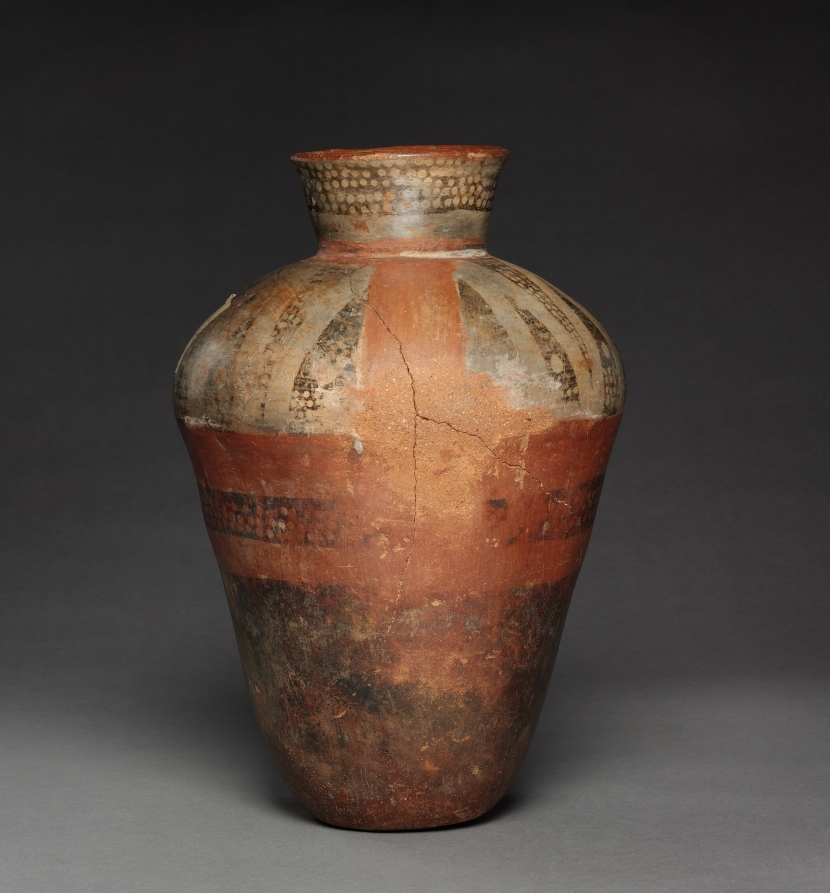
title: Vase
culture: Colombia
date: 1000–1550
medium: pottery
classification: Ceramic